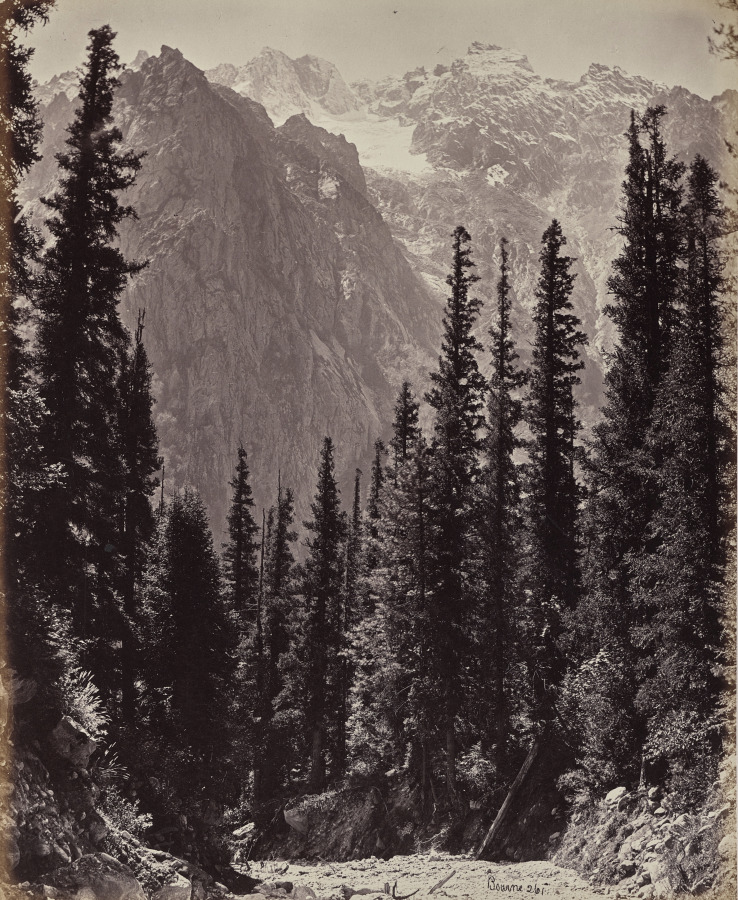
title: The Upper Himmalayahs. View in the Manga Valley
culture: England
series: Photographs of Northern India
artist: Samuel Bourne (British, 1834–1912)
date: 1863–70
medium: albumen print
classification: Photograph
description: The 50 images in this album, all taken in the 1860s, move from the hill towns of the Himalayas down to cities including Lahore (now in Pakistan), Delhi, Lucknow, Agra, Benares (now Varansi), and Calcutta (now Kolkata). Architectural studies of major monuments offer valuable historical records of what sites such as the Taj Mahal and the imperial mosque of the Mughal emperors in Delhi looked like before twentieth-century restorations.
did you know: Samuel Bourne, the author of most the images in this album, was a banker in England before he moved to India to become a professional photographer.